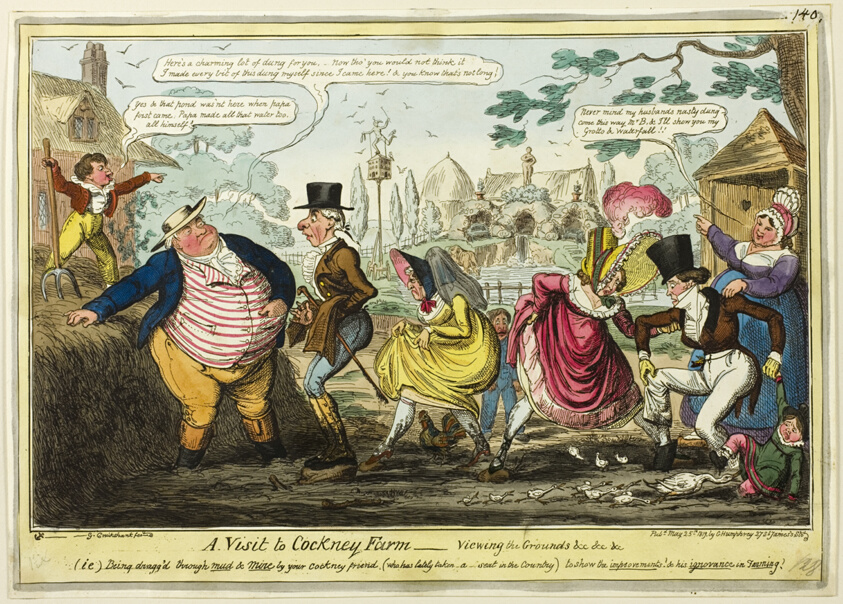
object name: Print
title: A Visit to Cockney Farm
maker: George Cruikshank (English, 1792-1878); after Captain Frederick Marryat (English, 1792-1848); published by George Humphrey (English, c. 1773-1831)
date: published May 25, 1819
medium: Hand-colored etching on paper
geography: England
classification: etching; print; prints and drawing